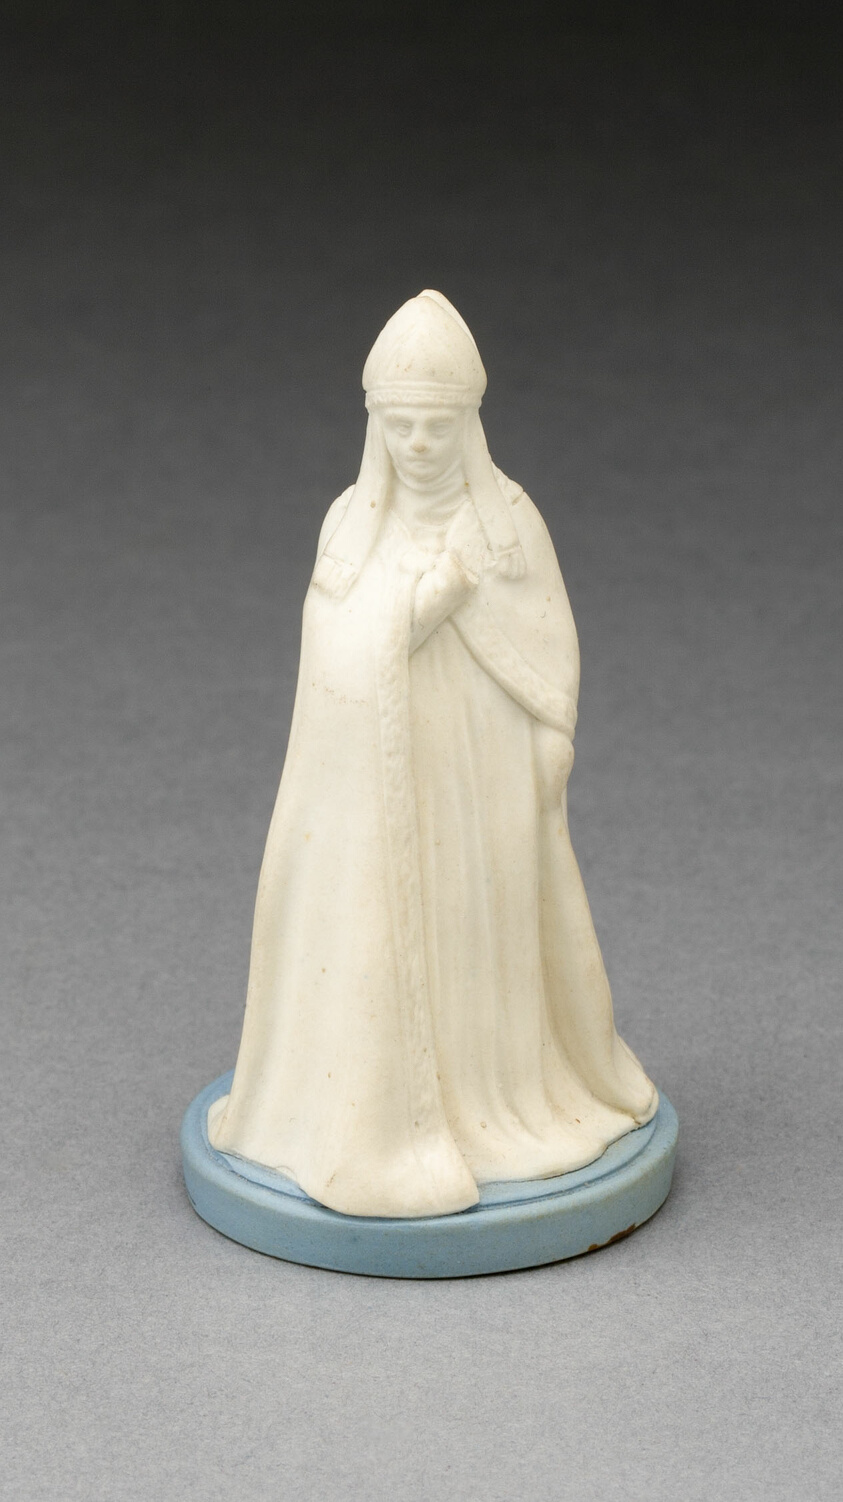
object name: Ceramics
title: Chess Piece: Bishop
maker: Wedgwood Manufactory (England, founded 1759)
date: 19th century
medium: Stoneware (jasperware)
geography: Burslem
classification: accessories (object genre); stoneware; european decorative arts; ceramics